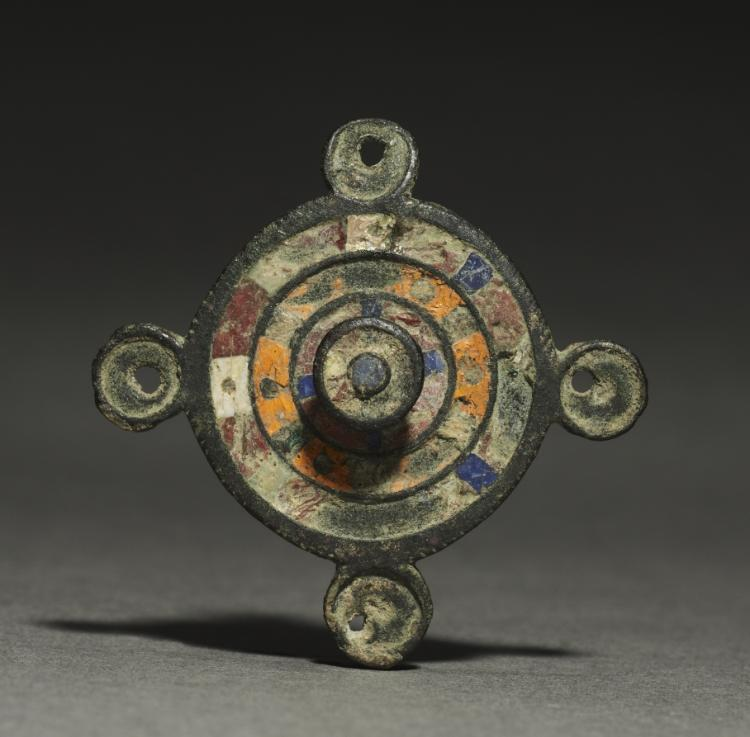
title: Ornamental Brooch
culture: Gallo-Roman or Romano-British, Migration period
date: c. 100–300 CE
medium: bronze and champlevé enamel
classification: Jewelry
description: These brooches functioned as garment clasps (much like the generally larger fibulae) and are distinctive for their decorative enamels. The art of enameling was highly popular among the conquered peoples who lived on the outskirts of the Roman empire, chiefly the Celts and the Gauls. Though the enameling technique was practiced by the Romans themselves on small objects, the brightly colored decoration readily appealed to "barbarian" taste. By the AD 200s, enameled brooches like these were being made in abundance by the native peoples of Britain and Gaul (modern France and Belgium).